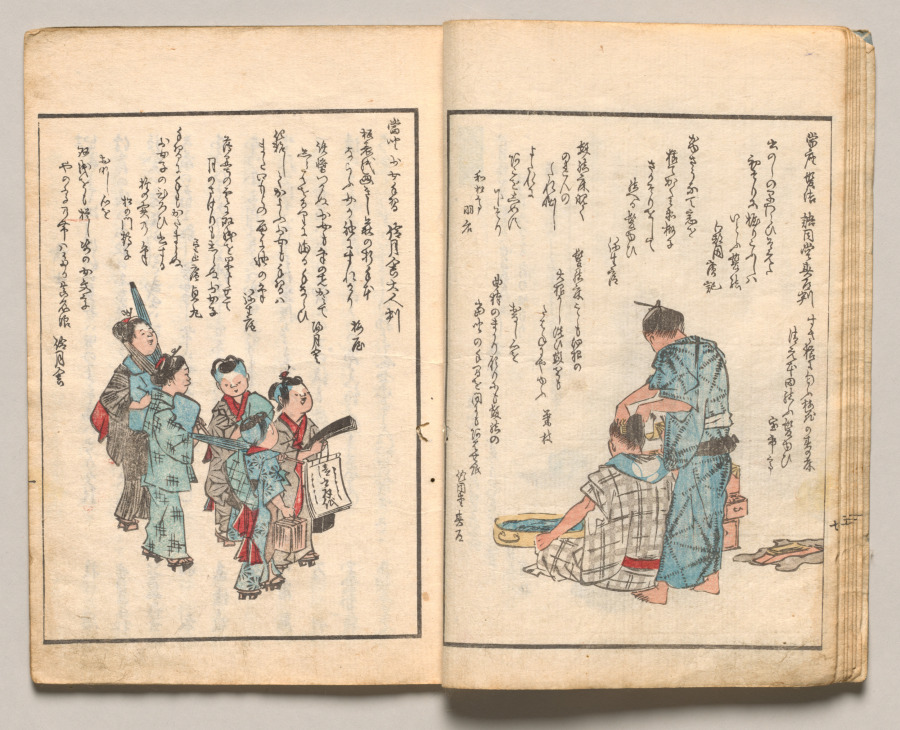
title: Spread Eight from Volume Two of People of Japan in Light Verse (Kyōka)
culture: Japan, Edo period (1615–1868)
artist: Utagawa Hiroshige (Japanese, 1797–1858)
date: 1857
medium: Woodblock-printed book; ink and color on paper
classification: Bound Volume